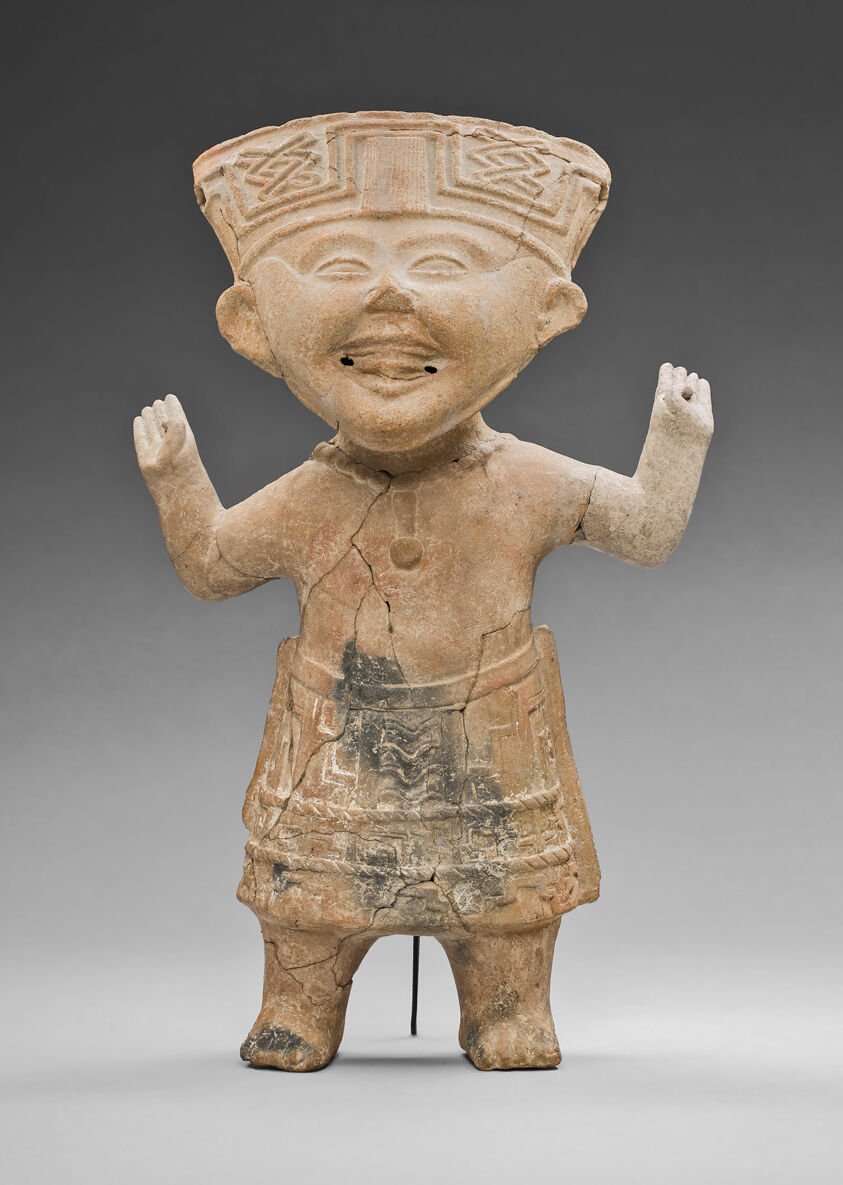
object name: Sculpture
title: Standing, "Smiling" Figure with Hands Raised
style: remojadas, Arts of the Americas, mesoamerican, veracruz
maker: Remojadas (Veracruz, south-central Gulf Coast, Mexico)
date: 600–900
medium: Ceramic and pigment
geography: Veracruz state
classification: sculpture; art of the americas; statue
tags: people